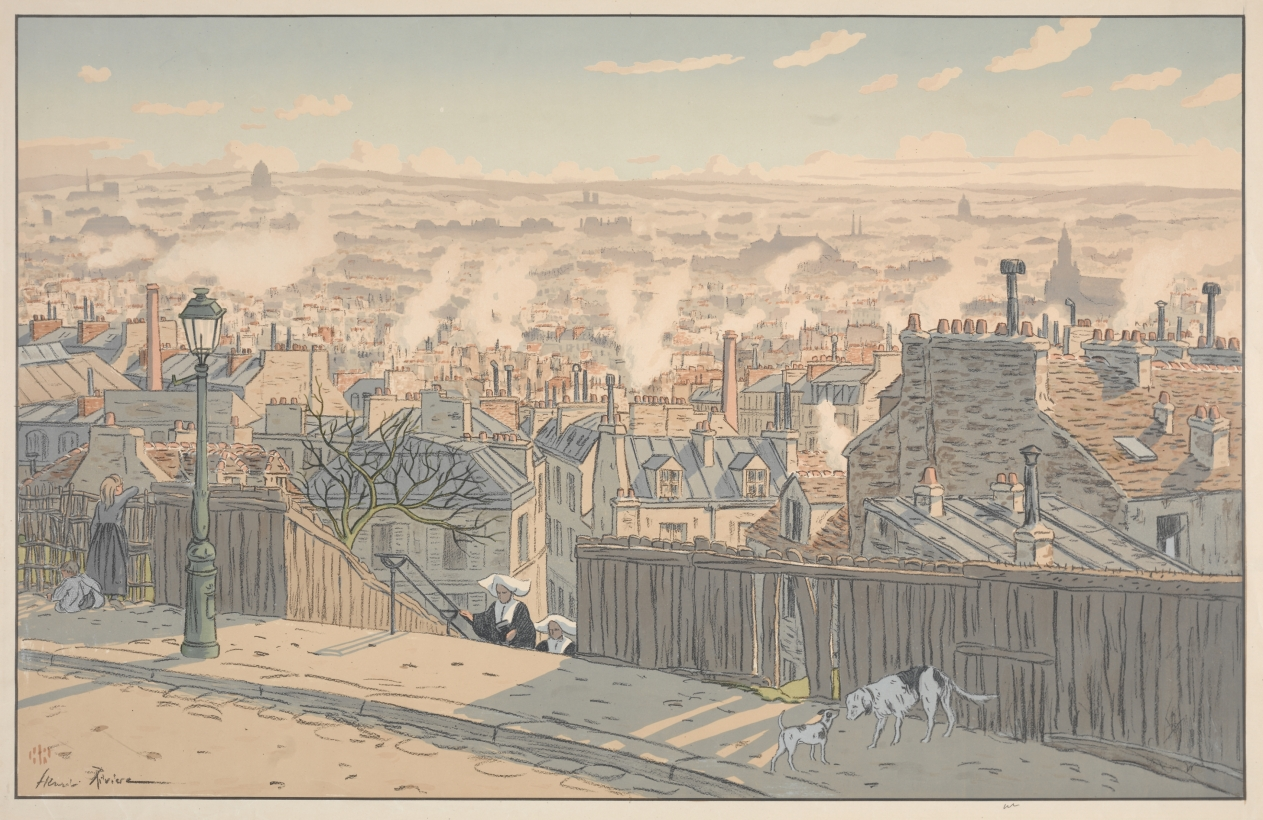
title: Parisian Landscapes: Paris seen from Montmartre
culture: France, early 20th century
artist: Henri Rivière (French, 1864–1951)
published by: Printed by Verneau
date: 1900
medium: color lithograph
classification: Print